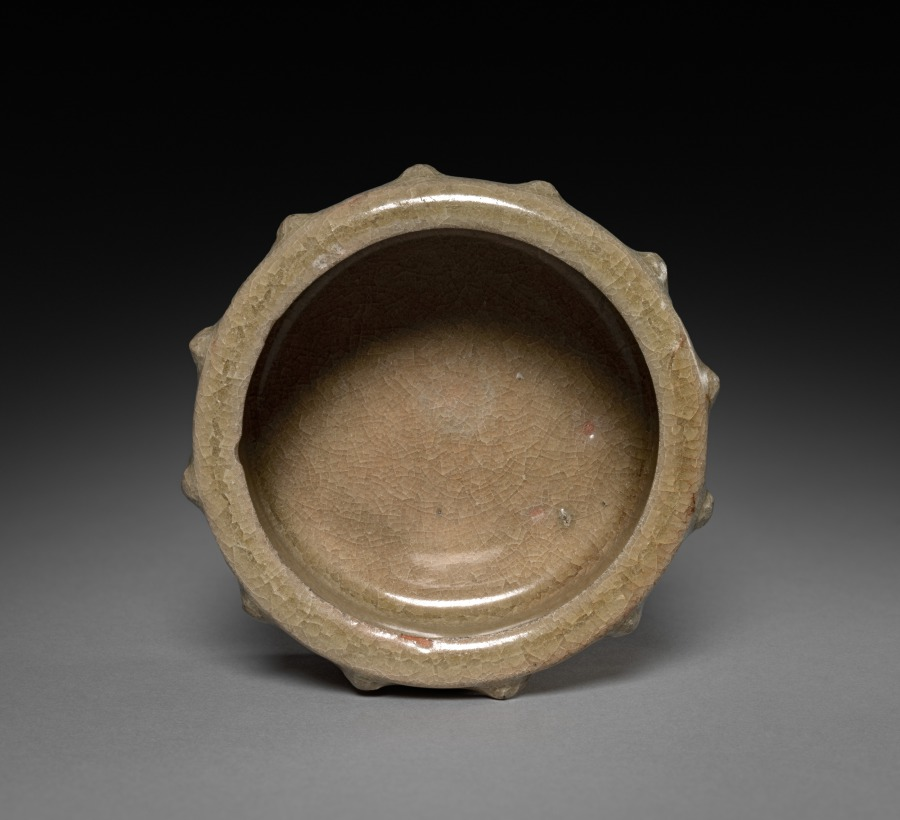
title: Incense Burner: Southern Celadon Ware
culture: China, Yuan dynasty (1271-1368)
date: 1271–1368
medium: glazed buff stoneware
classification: Ceramic